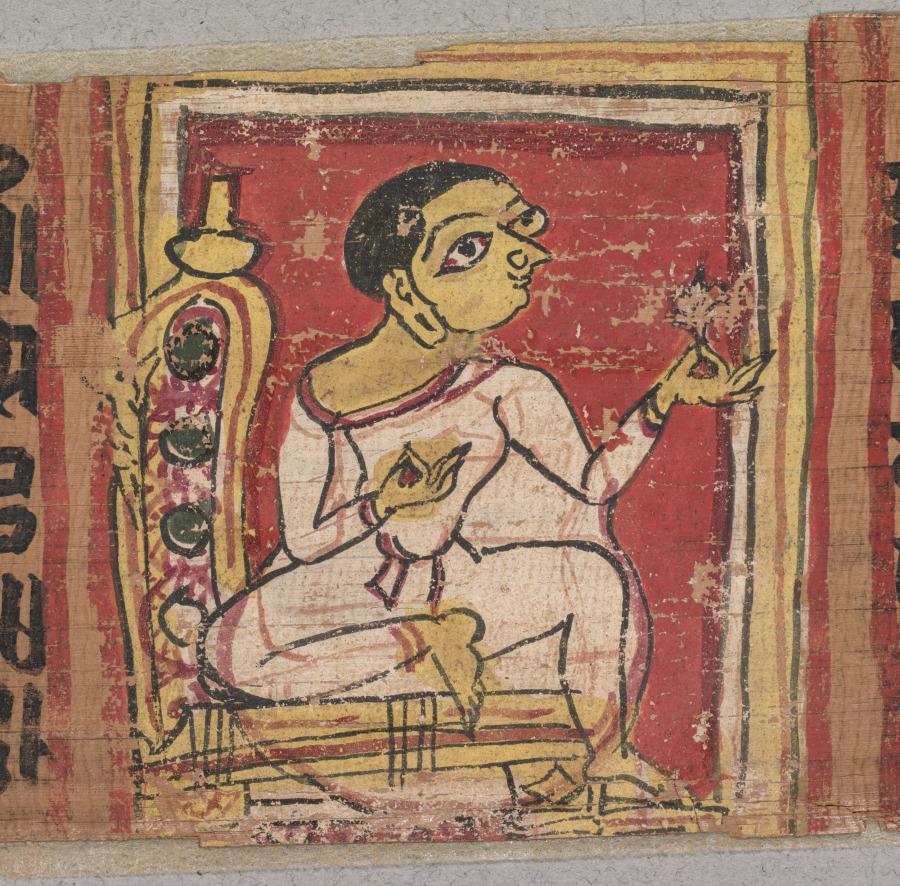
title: Monk Holding a Flower: Folio 2 (recto), from a Kalpa-sutra and Story of Kalakacharya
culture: Western India, Gujarat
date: 1287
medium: gum tempera and ink on palm leaf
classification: Painting